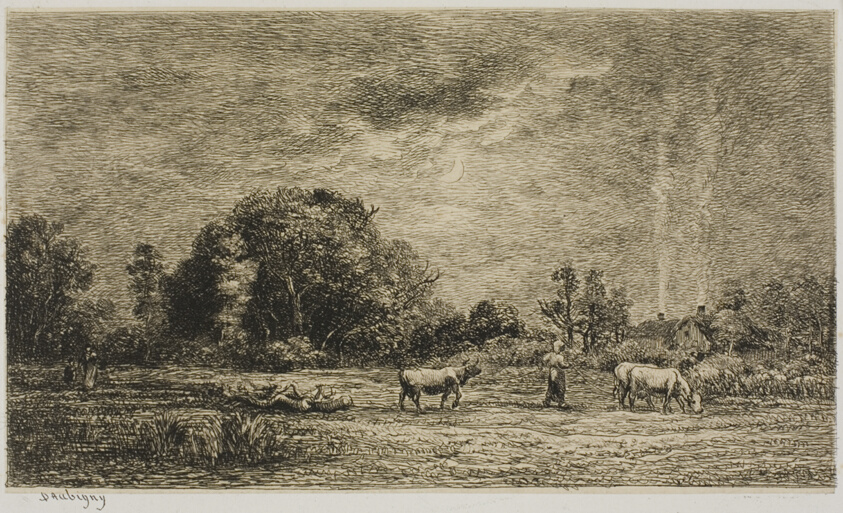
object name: Print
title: Moonrise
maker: Charles François Daubigny (French, 1817-1878)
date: 1861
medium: Etching on cream chine laid down on white wove paper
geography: France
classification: etching; print; prints and drawing